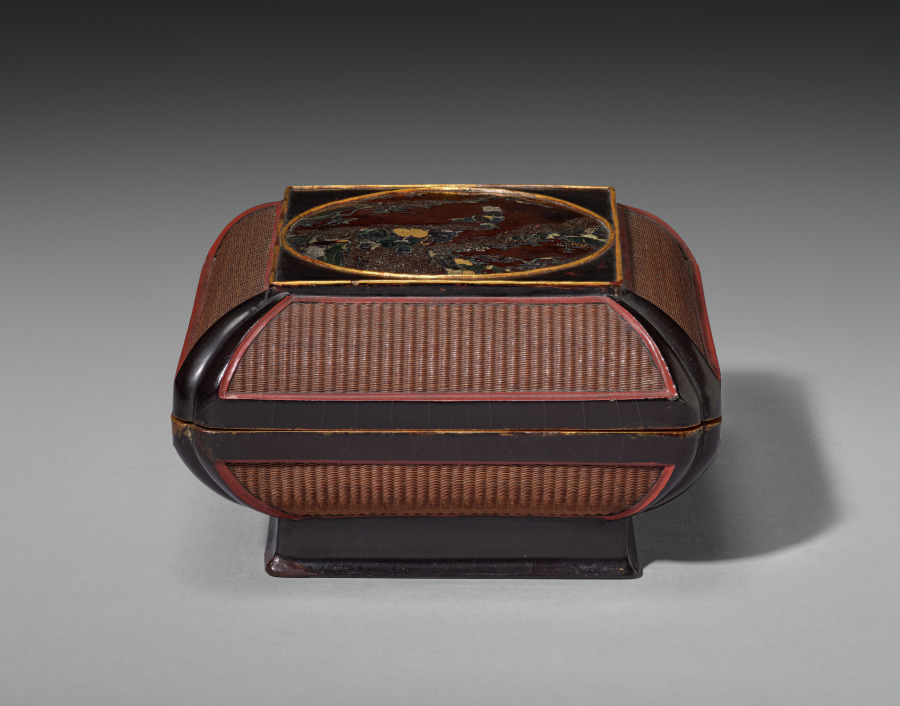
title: Wickerwork Box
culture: China, Ming dynasty (1368-1644), Wanli reign (1572-1620)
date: 1609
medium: lacquered wickerwork (of woven bamboo) framed in wood with circular scene inlaid in mother-of-pearl and gold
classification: Lacquer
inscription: Inscription at bottom in red on black lacquer reads: "commissioned by Yü-Yün-ch'i".